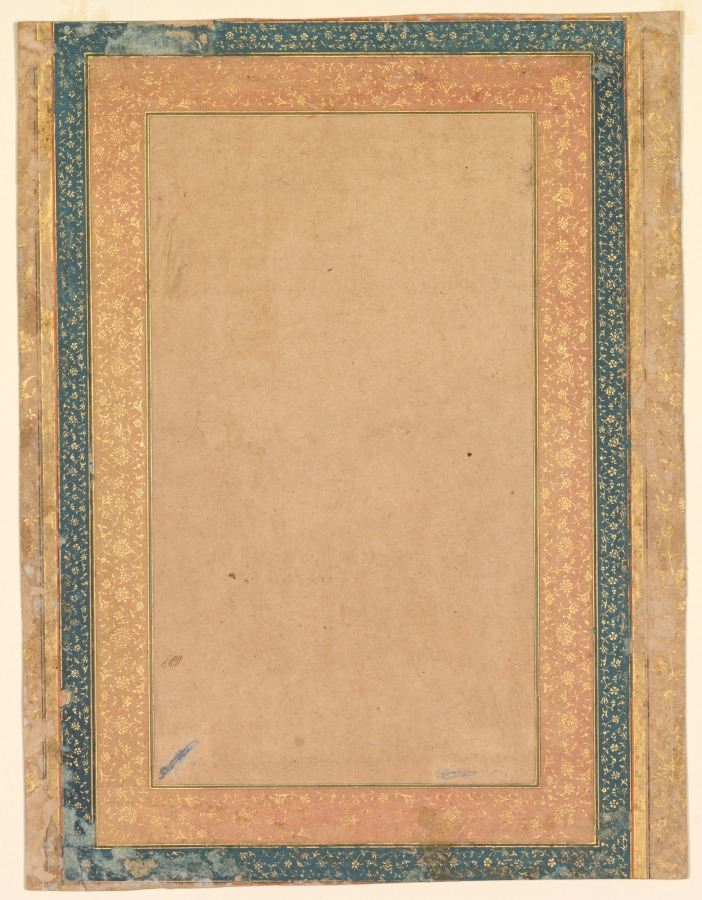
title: The dream of Zulaykha, from the Amber Album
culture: India, Mughal, 17th century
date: c. 1670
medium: Gum tempera, ink, and gold on paper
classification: Painting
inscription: verso: Central blank panel and similar borders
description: In Islamic texts, as in the Hebrew and Christian Old Testament traditions, Zulaykha is the unnamed wife of Potiphar, a wealthy Egyptian. This scene is from a popular Persian poem that recounts the story of Joseph and Zulaykha as a mystical romance, and describes her visionary dreams of a beautiful lover. In this painting we see the luxuriously dressed Zulaykha asleep on a terrace, reclining on ornate pillows as a vision of her love, Joseph, appears before her. He is illuminated by radiant light cast down by angels emerging from the dark night clouds.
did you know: Joseph, the man of Zulaykha’s dreams, is dressed as a Mughal prince.